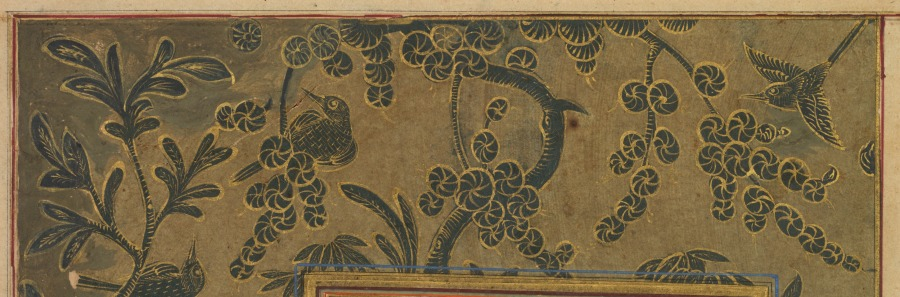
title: Zulaykha in her palace and as an elderly woman with Joseph (recto), from a Panj Ganj (Five Treasures) of Abd al- Rahman Jami (Persian, 1414–1492)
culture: Western Afghanistan, Herat (text); Mughal India (paintings)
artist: Mushfiq (Indian, active early 1600s)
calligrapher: Sultan 'Ali al-Mashadi (Iranian, 1430–1520)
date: 1603–7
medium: Gum tempera, ink, and gold on paper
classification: Painting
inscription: [[Upper left of painting, against a red background, in nasta’liq script]] ' amal - i Mushfiq sana 1015 Text on verso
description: The golden pot of white narcissus flowers at the bottom center of the painting signals that Zulaykha, leaning on her staff to the left, will imminently have her youth and beauty restored. In this Persian retelling of the Old Testament account from the Bible, Zulaykha lusted after Joseph, even though she was already married to Potiphar. Joseph, with the golden halo, resisted her advances until she became a widow and retained his youth, because of his extreme virtue. Above, Zulaykha as a young woman waits for Joseph in her house where murals of them as a happy couple are painted on the walls.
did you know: Zulaykha is shown four times: twice in the murals, seated in the center, and below when she is much older.